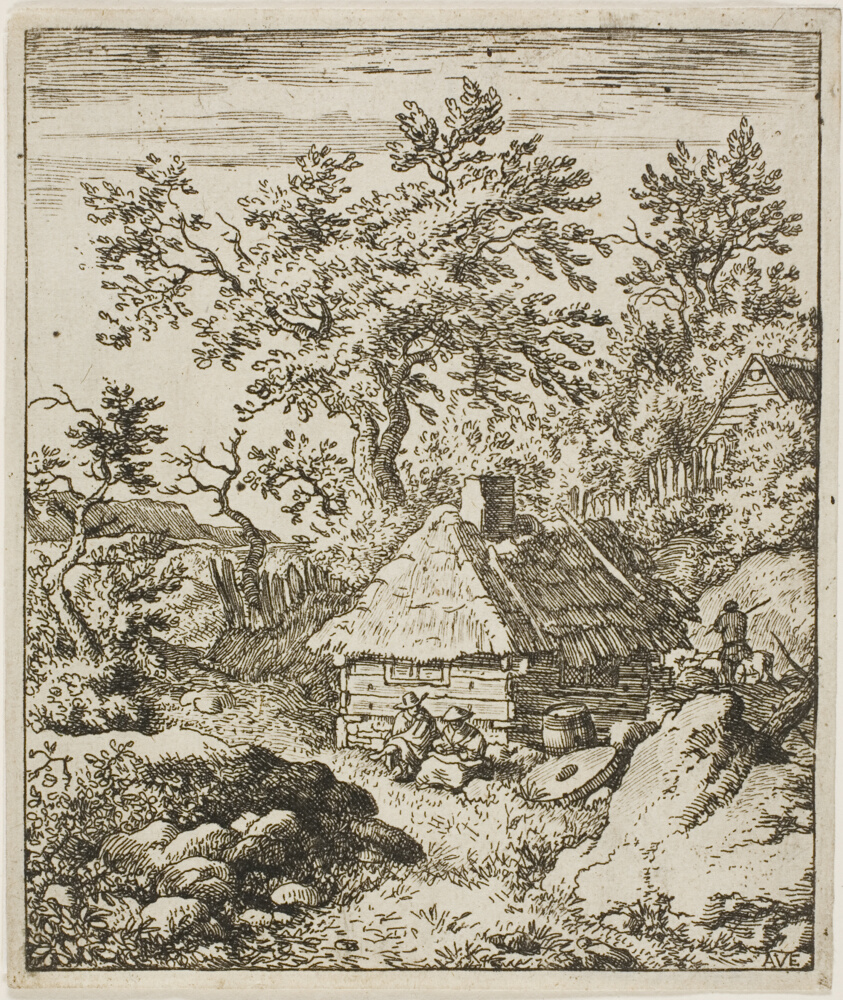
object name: Print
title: Landscape with a Millstone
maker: Allart van Everdingen; Dutch, 1621-1675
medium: Etching in black on ivory laid paper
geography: Holland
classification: etching; print; prints and drawing